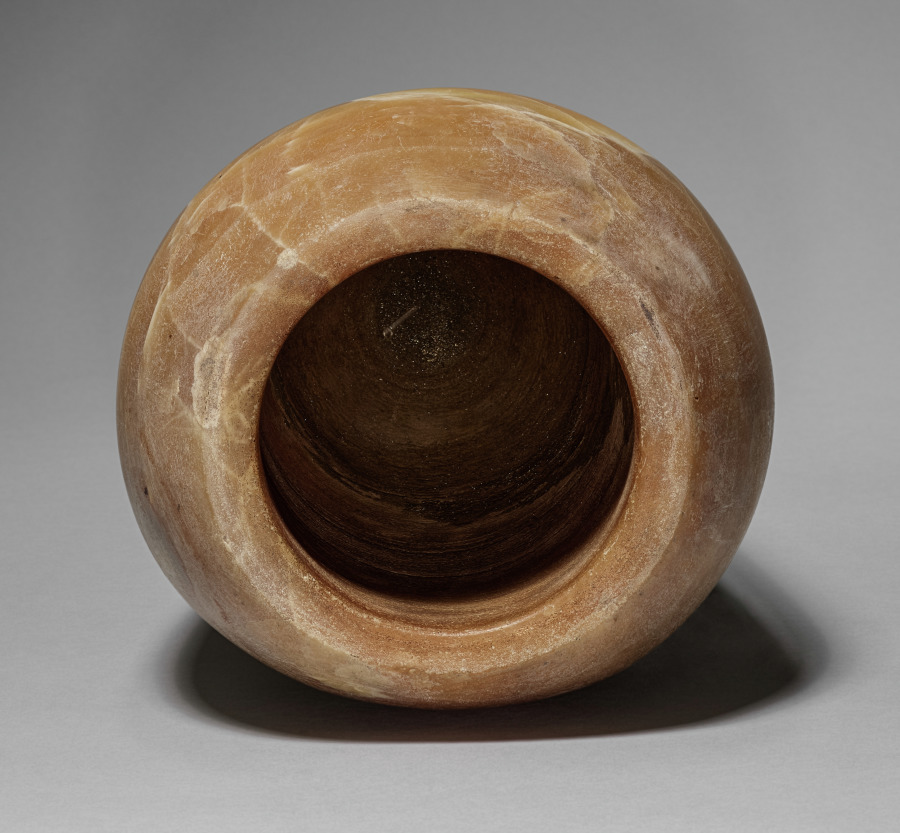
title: Canopic Jar with Jackal's Head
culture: Egypt, Late period (715–332 BCE), Dynasty 26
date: 664–525 BCE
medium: travertine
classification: Funerary Equipment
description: In the process of mummification, the liver, lungs, stomach, and intestines were removed, separately embalmed, and stored in specialized jars known as canopic jars (after a sailor in Greek mythology, who died at the town of Canopus in the Nile Delta and was worshipped there in the form of a human-headed jar). Each organ was identified with one of four funerary deities collectively known as the Sons of Horus: the liver with Imsety (man's head), the lungs with Hapy (baboon's head), the stomach with Duamutef (jackal's head), and the intestines with Qebehsenuef (falcon's head). It was their duty to protect the deceased and restore to him his body parts in the hereafter.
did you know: This jar is made of travertine stone-- subtle in color and with a captivating natural pattern-- with hieroglyphics carved on the front. Such jars were used to hold internal organs of the deceased and to preserve them for the afterlife.